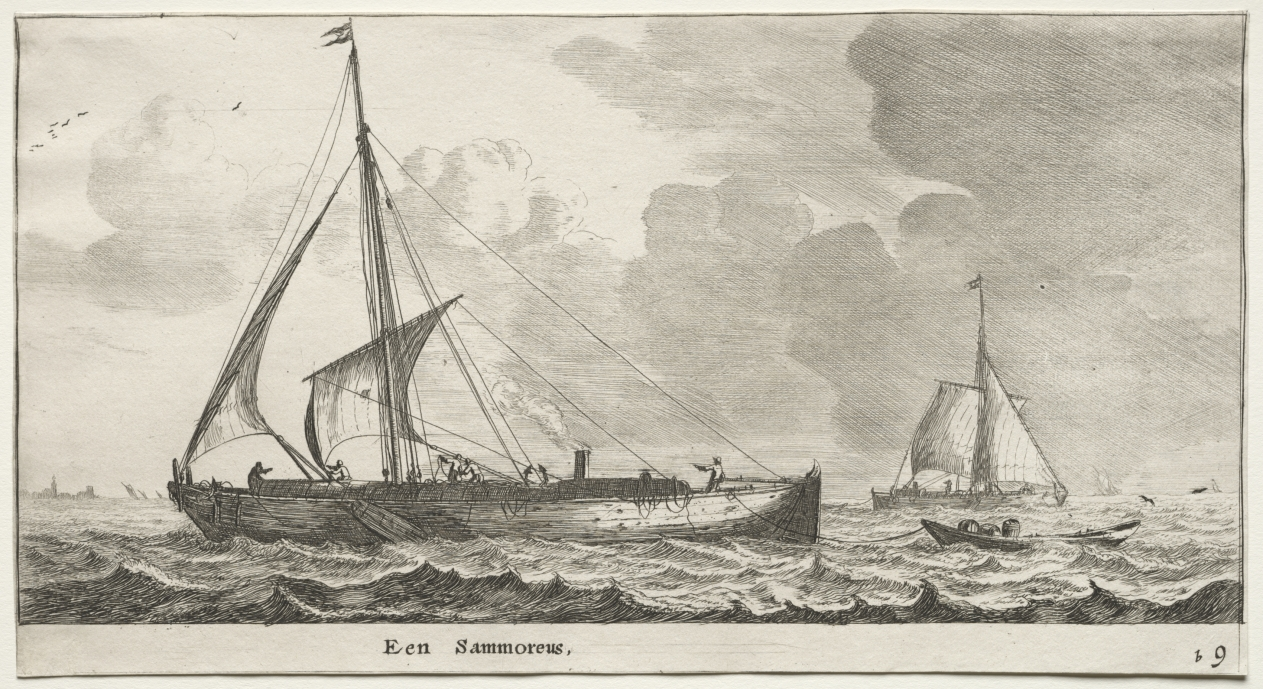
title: Various Ships and Views of Amsterdam (Verscheÿde Schepen en Gesichten van Amstelredam), Part II: A Merchantman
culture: Netherlands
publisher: Clement de Jonghe (Dutch, 1579–1679)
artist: Reinier Nooms, called Zeeman (Dutch, c. 1623–1664)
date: 1652–54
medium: etching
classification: Print